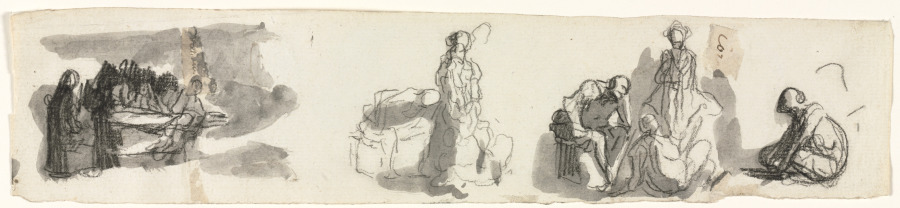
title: Sheet of Studies with a Group of Four Figures to the Right (recto) Sketches of Various Figures (verso)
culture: France, 19th century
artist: Honoré Daumier (French, 1808–1879)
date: third quarter 1800s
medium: black chalk and brush and gray wash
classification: Drawing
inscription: ON A SEPERATELY APPLIED PIECE OF PAPER, upper left, in gray ink: [illegible, cropped] ; ON A SEPERATELY APPLIED PIECE OF PAPER, upper right, in gray ink: co[cropped]